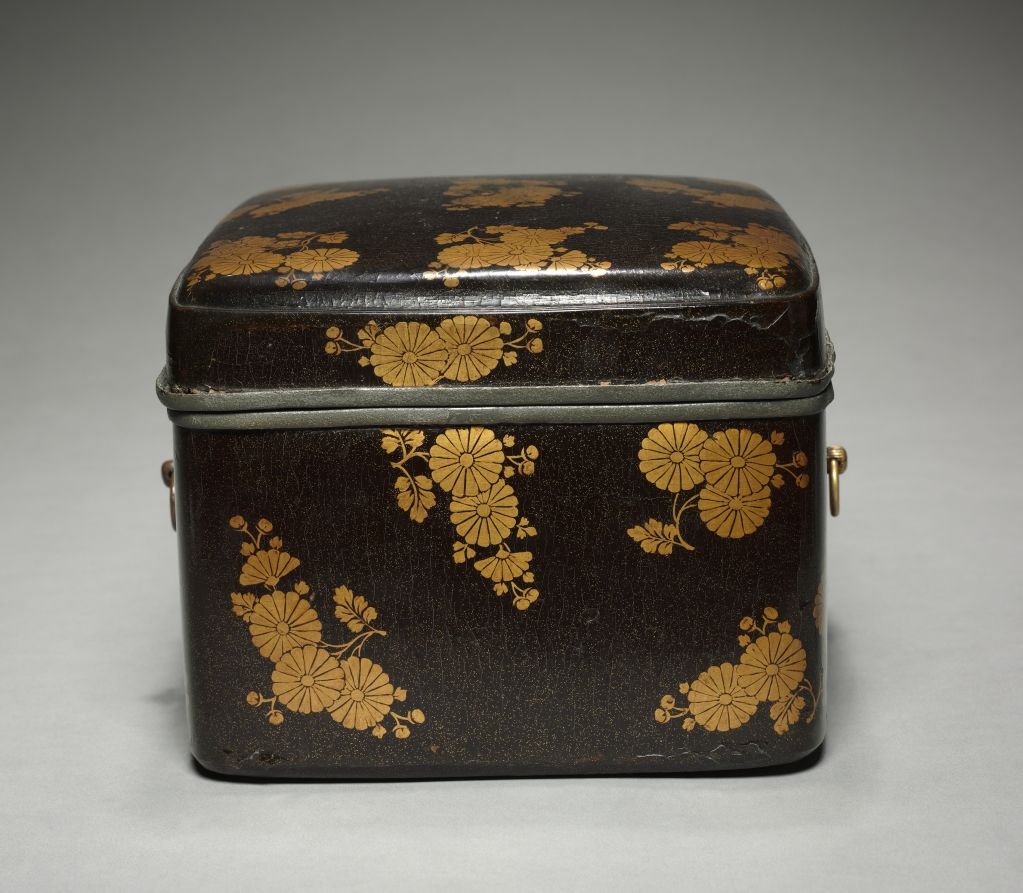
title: Cosmetics Box with Chrysanthemums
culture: Japan, Kamakura period (1185–1333)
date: early 1300s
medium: lacquer on wood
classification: Lacquer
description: In China, the chrysanthemum was historically appreciated for its association with the Double Nine Festival and the reclusive life of the poet Tao Yuanming (AD 365-427). In Japan, the 16-petaled chrysanthemum came to symbolize the Japanese imperial family after Emperor Gotoba (1180-1239) chose the motif as his personal emblem, having it applied to his sword and everyday utensils. This box proves that the flower also appeared on lacquer wares as early as the Kamakura period.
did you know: In Japanese, this type of small box is called a tebako, literally a hand box, and was typically part of a cosmetics set.